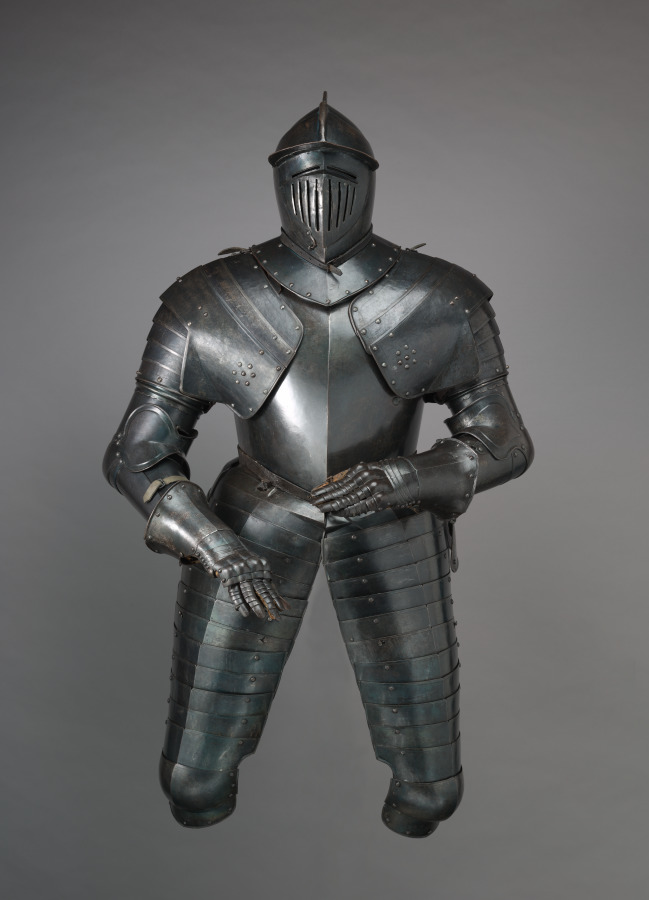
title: Cuirassier's Armor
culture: Austria, Graz(?), early 17th century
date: c. 1600–20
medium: steel (originally blued, now black); leather straps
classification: Arms and Armor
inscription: Proof mark (musket shot) is located on the proper left side of the breastplate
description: The cuirassier was the heavy cavalryman of the late 1500s and early 1600s. Carrying pistols and a sword, he was clad in full armor, like this suit, with the exception of his lower legs, which were protected by heavy riding boots. Shortly after 1650, such heavy cavalry armor disappeared from use. By then, European cavalries had abandoned full armor as impractical against the increased sophistication of firearms. Similar armors survive in the Armory of Graz, Austria.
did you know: This suit of armor is just over 5 1/2 feet tall.